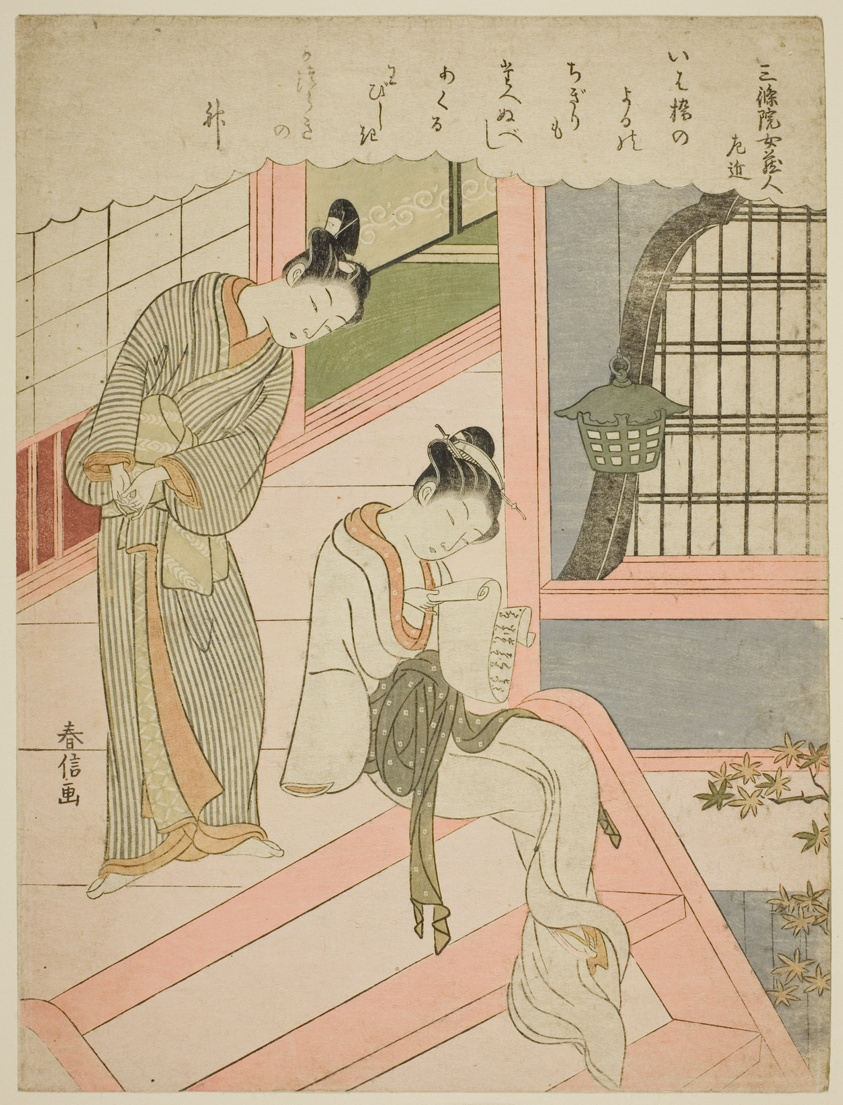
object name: Print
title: Poem by Sanjo'in no Nyokurodo Sakon, from an untitled series of Thirty-Six Immortal Poets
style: Japanese (culture or style)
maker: Suzuki Harunobu 鈴木 春信; Japanese, 1725 (?)-1770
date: c. 1767/68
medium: Color woodblock print; chuban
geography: Japan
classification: woodblock print; print; asian art